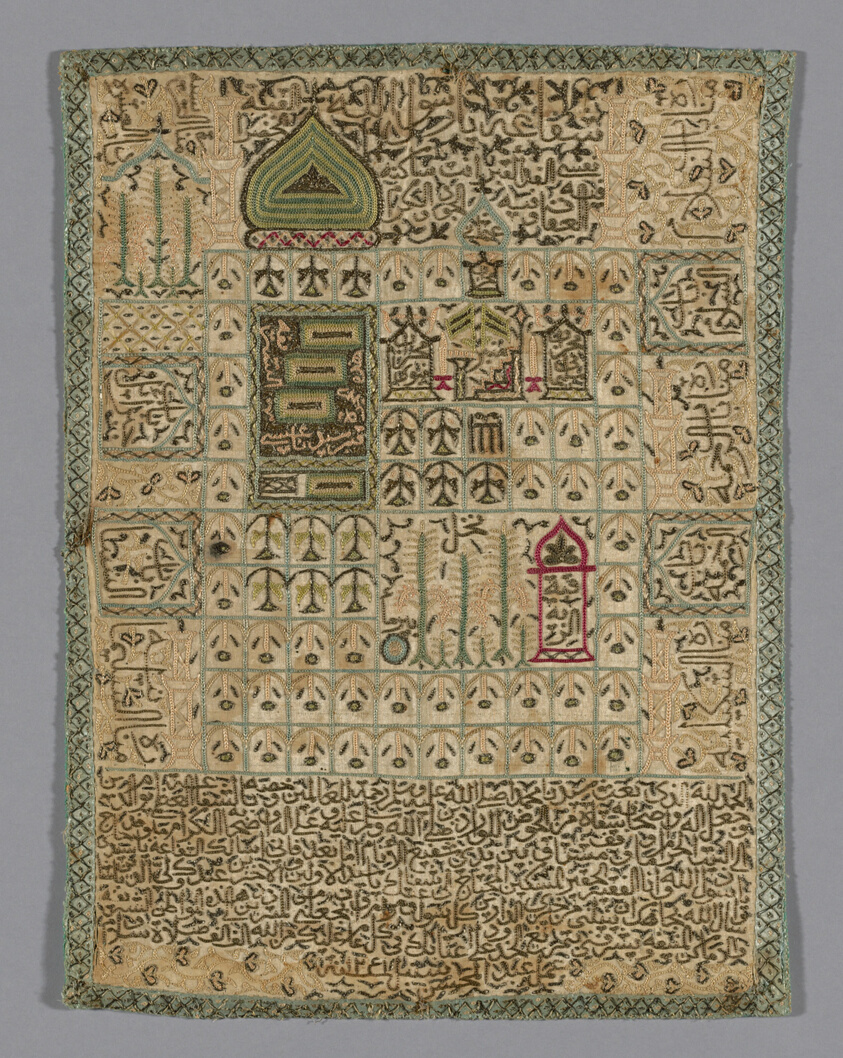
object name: Textile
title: Talisman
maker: Turkey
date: Ottoman dynasty (1299–1923), 1825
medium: Silk, plain weave; edged with plain weave; embroidered with silk and gilt-metal-strip-wrapped silk in chain and lattice filled with twisted picot stitches. Lining: silk, 4/1 satin weave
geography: Turkey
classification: textile; needlework (visual works)